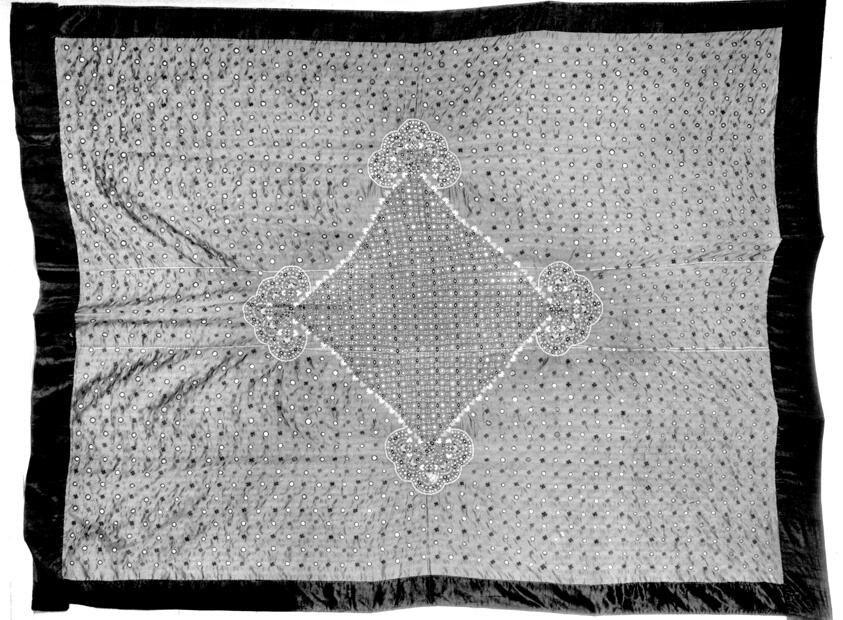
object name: Textile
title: Cover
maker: India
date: 19th century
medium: Plain simple dark crimson satin edged by dark blue plain simple satin; embroidered in buttonhole, stem, and chain stitches in yellow, dark blue, and white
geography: India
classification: textile; needlework (visual works)